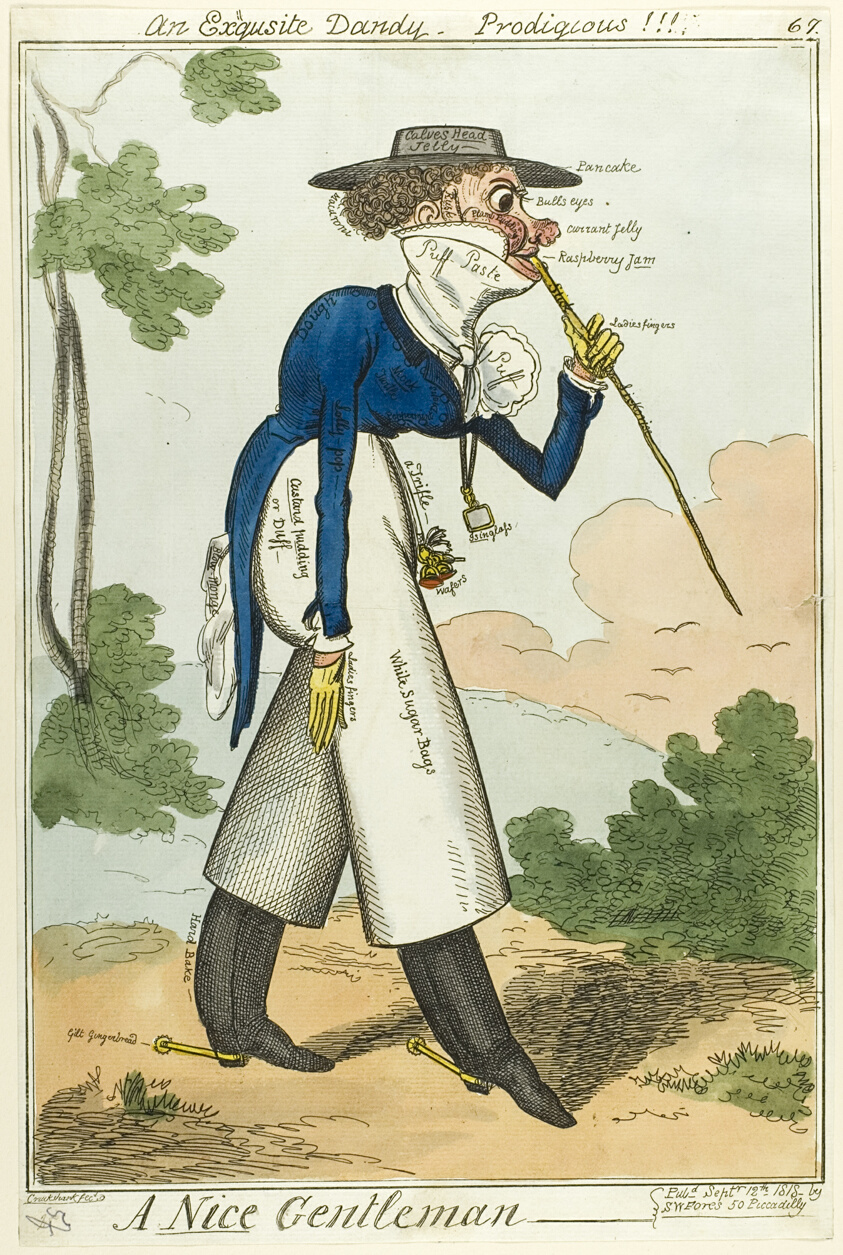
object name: Print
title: A Nice Gentleman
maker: Isaac Robert Cruikshank (English, 1787=1856); published by S.W. Fores (English, 1761-1838)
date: published September 12, 1818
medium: Hand-colored etching on paper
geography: England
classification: etching; print; prints and drawing